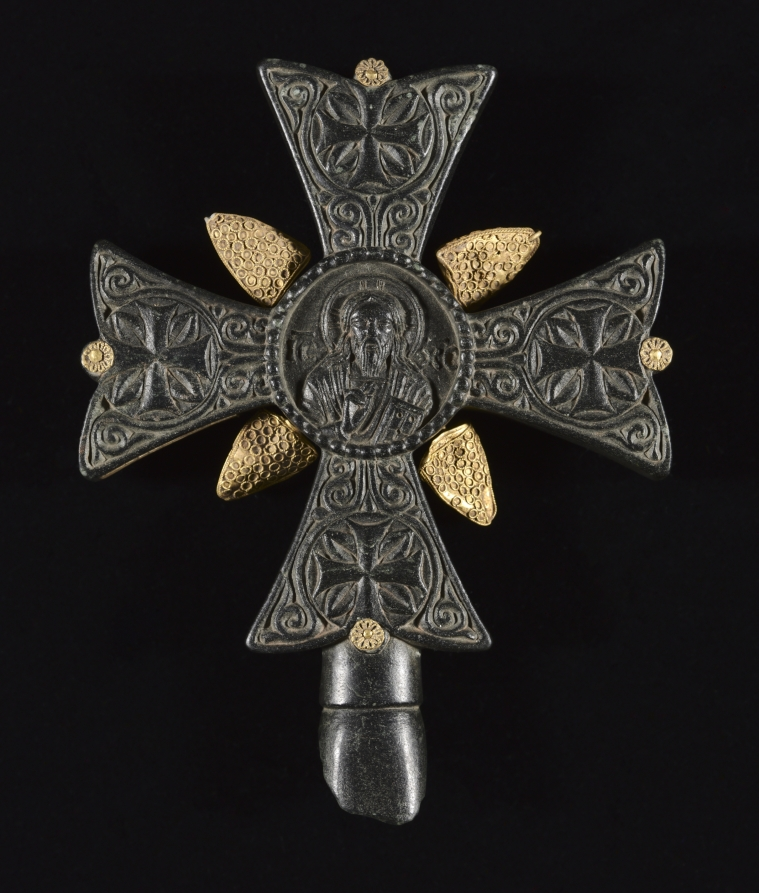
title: Benediction Cross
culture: Byzantium, Byzantine period, 13th-15th century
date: 1200s-1400s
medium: black schist, gold, silver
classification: Glyptic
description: This cross is decorated with images of Christ Pantokrator (Ruler of the World) on the front and the Virgin Orans (Virgin Praying) on the back.